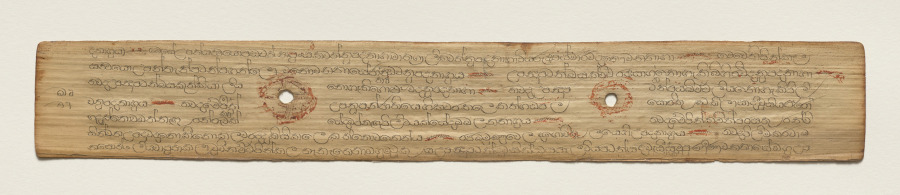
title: Leaf from a Buddhist Manuscript (recto)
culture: Sri Lanka, Singhalese, Late 17th century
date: c. 1700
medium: fiber paper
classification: Manuscript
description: Palm leaf material is still used for manuscripts in Sri Lanka. The palm leaves are prepared first by boiling them, drying them in the sun, and then rubbing them with oils. Scribes then use a metal stylus to incise the text. Then charcoal powder is wiped across the pages, filling in only the inscribed lines.